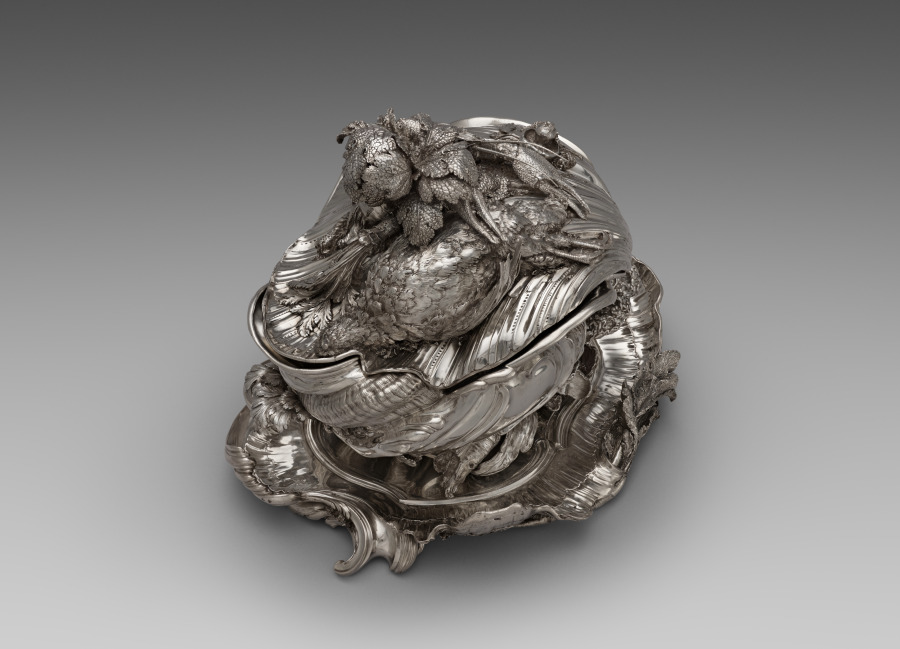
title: Covered Tureen on Stand (Pot-à-oille)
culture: France, Paris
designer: Juste-Aurèle Meissonnier (French, 1695–1750)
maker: Pierre-François Bonnestrenne (French)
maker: Henry Adnet (French, 1745)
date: 1735–38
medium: silver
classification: Silver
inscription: [Maker’s mark of Pierre−François Bonnestrenne, beneath platter; inside tureen (two marks)]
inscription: [Warden's mark for Paris, 1734−1735, beneath platter; inside tureen; inside cover]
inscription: [Charge mark of Hubert Louvet, Paris, 1732-1738, on platter border; beneath platter; beneath tureen; inside cover; inside tureen (two marks)]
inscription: [Discharge mark of Louis Robin mostly used for stamping small work, Paris 1738−1744, on platter border; beneath tureen]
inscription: [Warden's mark for Paris, 1736−1737, on platter border]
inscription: [Possibly British import mark, London, 1925, on platter border]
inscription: [Possibly mark of the British firm Charles & Richard Comyns, on platter border]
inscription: [Discharge of Louis Robin mostly used for stamping gold and silver between 1738 and 1744, beneath tureen; outside cover]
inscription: [Maker’s mark of Henry-Guillaume Adnet, inside cover]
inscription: [Two small undefined marks, inside cover]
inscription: [Under the surface of the platter the engraved signature]: “FAIT-PAR-I-A-MEISSONIER-ARCHITECTTE”; [and the weight] “673=5"; “No. [v] I 50 £ b76Sol”; [and the numbers] “A nº 1”; “A nº2”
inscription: [On tureen lip]: "MEISSONIER"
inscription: [On tureen lip]: “A nº 3”; “A nº2” [in order to place the tureen correctly on the stand]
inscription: [Numbers engraved on the stand, the tureen, and the cover to show how the piece should be assembled]: “A nº 1” [on the base of the tureen; beneath the cover; on the platter], “A nº 2” [on the platter], “A nº 3” [on the exterior rim of the tureen], “A nº4”; “A nº 5” [outside the cover], “A nº 7” [on the border of the platter]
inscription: [Two warden's marks for Paris, 1735-1736, beneath tureen]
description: This tureen exemplifies the French Rococo style, an artistic movement celebrating naturalistic forms that developed in Paris during the early 1700s. In contrast to classical, controlled symmetry, Rococo forms morph, twist, and spill into the space around them. Meissonnier embellished this tureen in a picturesque arrangement of vegetables and creatures, transforming a utilitarian object into a decadent display of wealth and abundance. This masterpiece comes from a set of two tureens commissioned by the English Duke of Kingston during an extended stay in Paris in the 1730s.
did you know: The langoustine, pigeon, and vegetables were cast using real examples giving the silver copies lifelike detail and appearance.